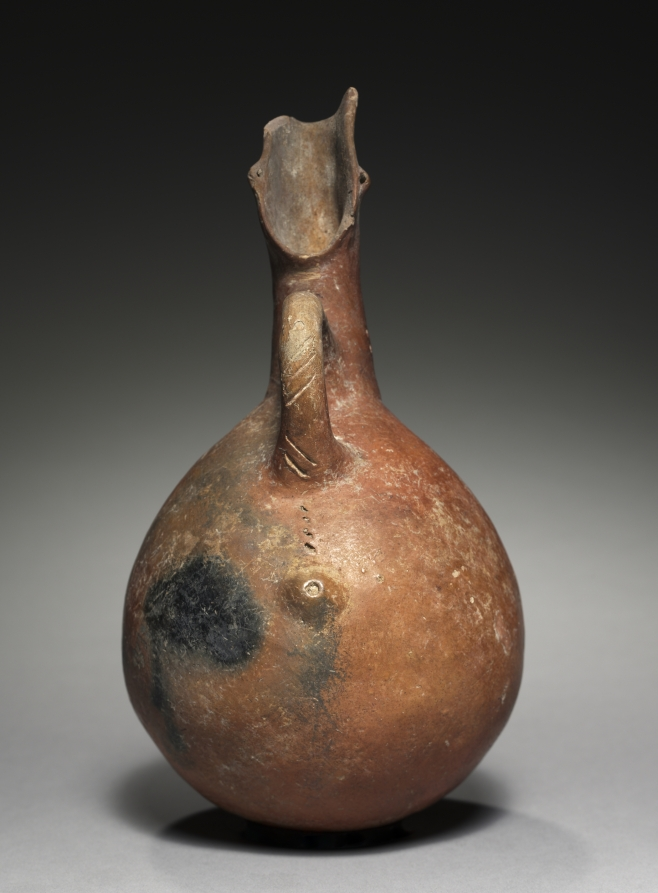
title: Jug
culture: Cyprus, early Cypriot III–middle Cypriot I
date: c. 2000–1800 BCE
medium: red ware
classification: Ceramic